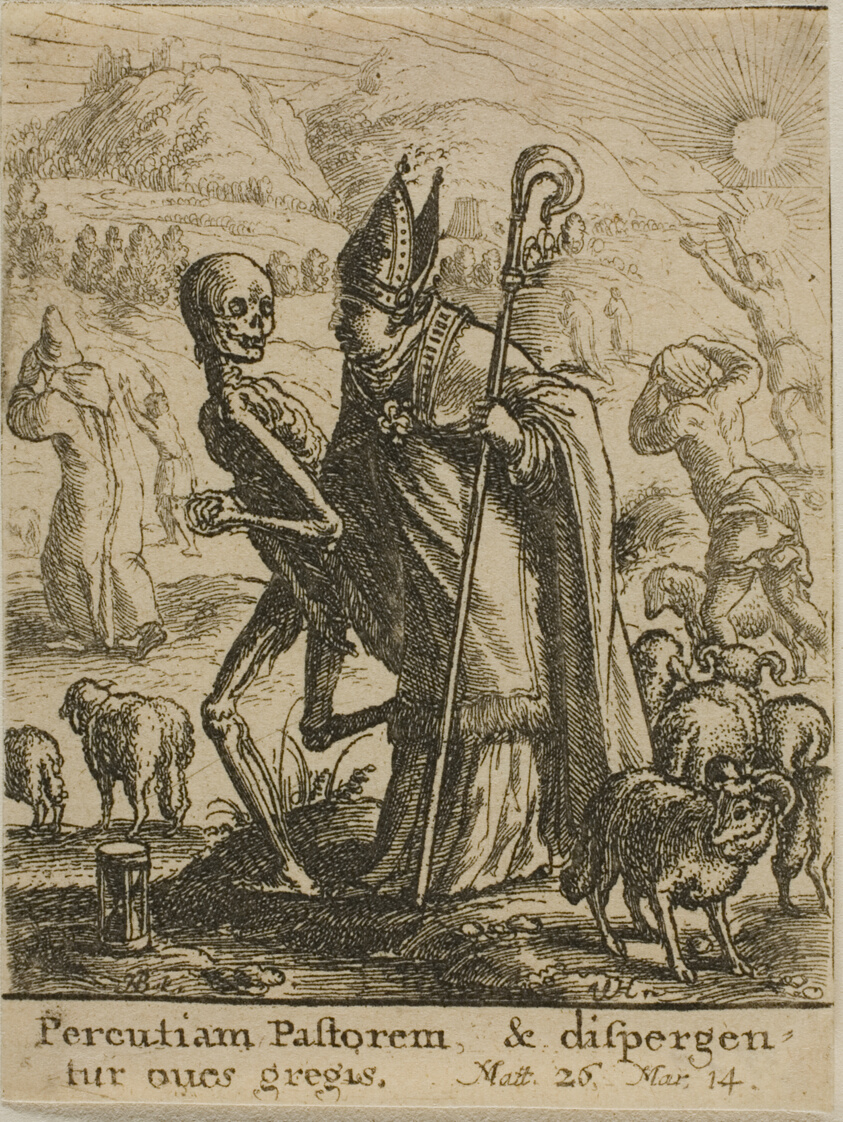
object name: Print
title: The Bishop and Death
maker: Wenceslaus Hollar (Bohemian, 1607-1677); after Hans Holbein the younger (German, c.1497-1543)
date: 1651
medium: Etching on ivory wove paper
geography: Bohemia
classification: etching; print; prints and drawing